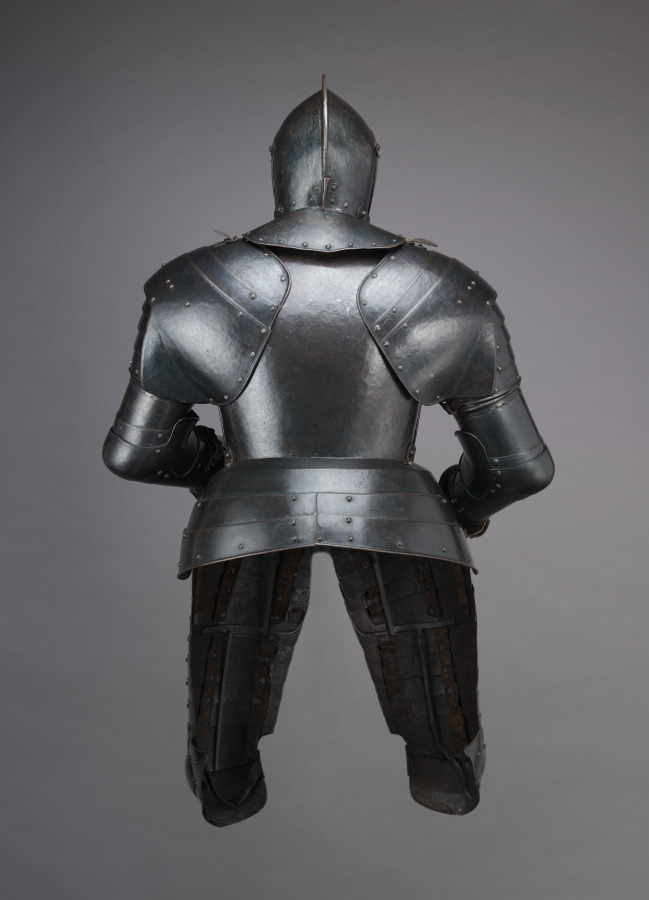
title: Cuirassier's Armor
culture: Austria, Graz(?), early 17th century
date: c. 1600–20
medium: steel (originally blued, now black); leather straps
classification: Arms and Armor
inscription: Proof mark (musket shot) is located on the proper left side of the breastplate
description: The cuirassier was the heavy cavalryman of the late 1500s and early 1600s. Carrying pistols and a sword, he was clad in full armor, like this suit, with the exception of his lower legs, which were protected by heavy riding boots. Shortly after 1650, such heavy cavalry armor disappeared from use. By then, European cavalries had abandoned full armor as impractical against the increased sophistication of firearms. Similar armors survive in the Armory of Graz, Austria.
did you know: This suit of armor is just over 5 1/2 feet tall.